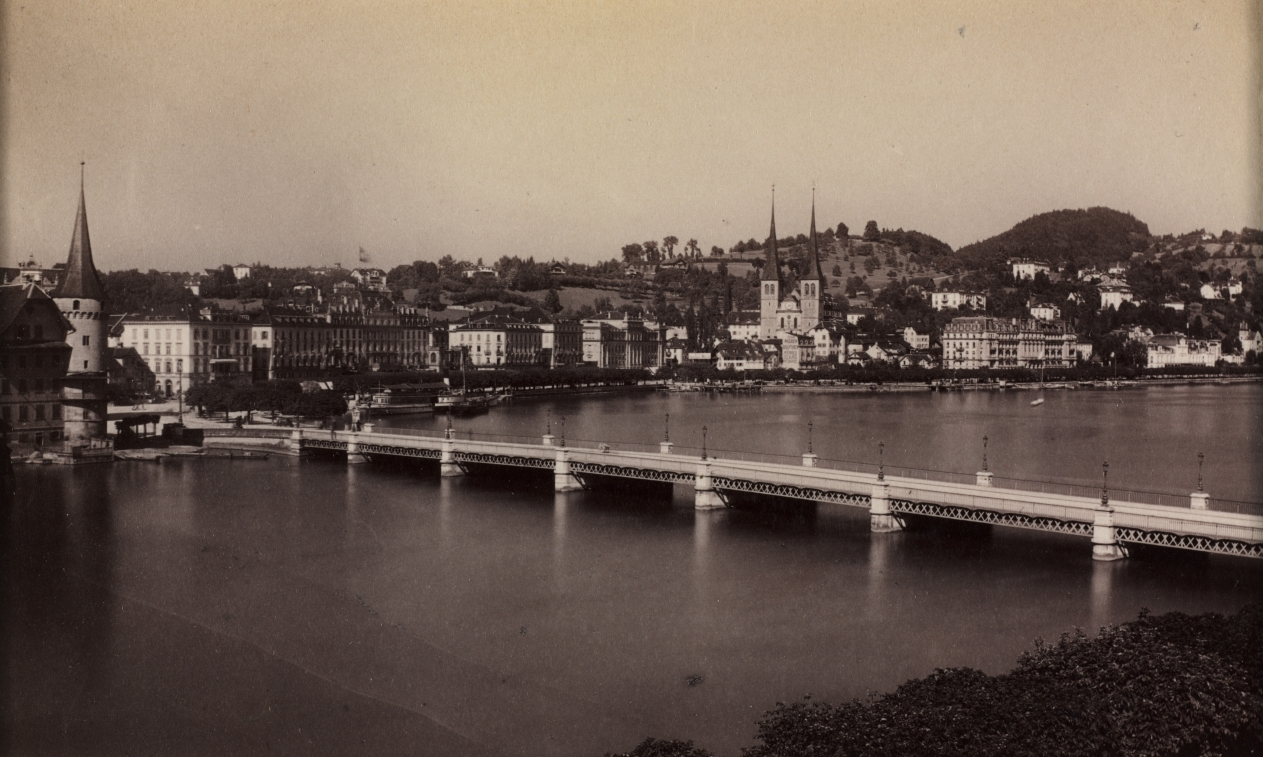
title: Untitled (Bridge with Town in Distance)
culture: 19th century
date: 1900s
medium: albumen print from wet collodion negative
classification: Photograph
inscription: written in pencil on verso: "477 (?)="